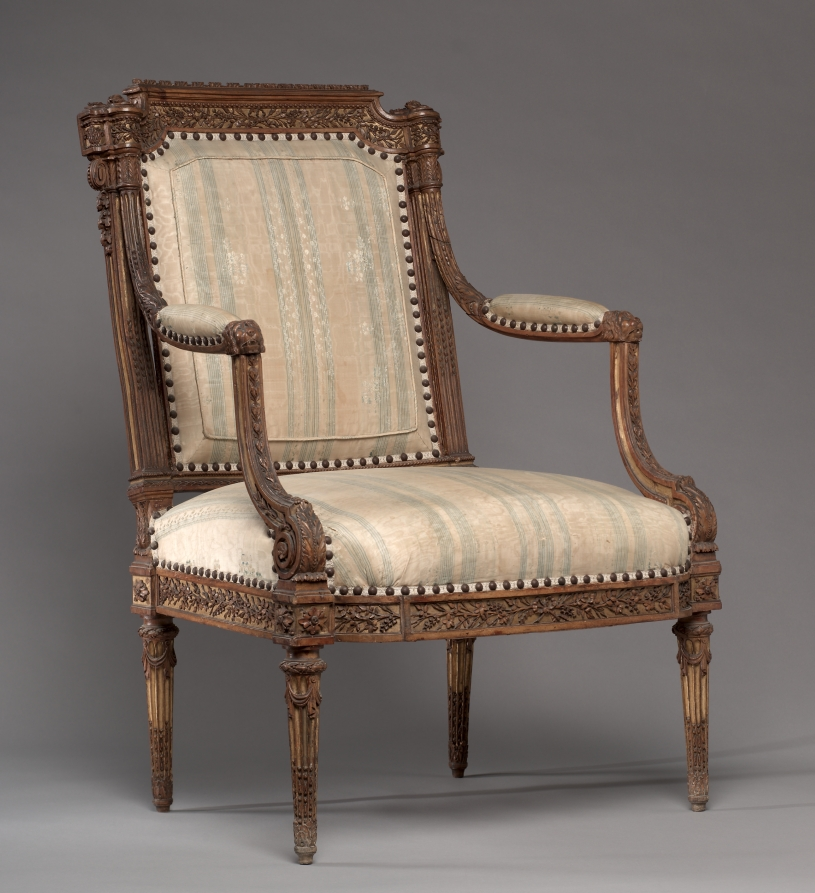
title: Armchair (Fauteuil) (1 of 2)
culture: France, 18th century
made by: Nicolas-Denis Delaisement (French)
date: c. 1785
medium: boxwood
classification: Furniture and woodwork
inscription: signed on back of frame of seat underneath: Delaisement with inverted "s."